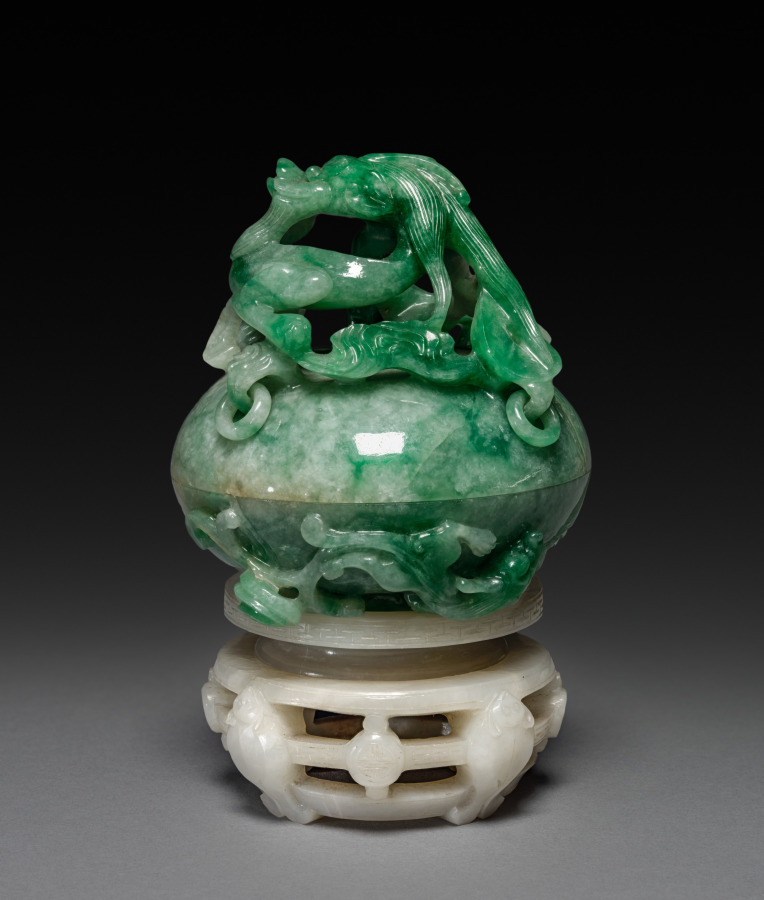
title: Three-Sectional Altar Group: Small Bowl with Carved Dragon with Lid and Base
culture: China, Qing dynasty (1644-1911)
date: 1644–1911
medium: jade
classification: Jade